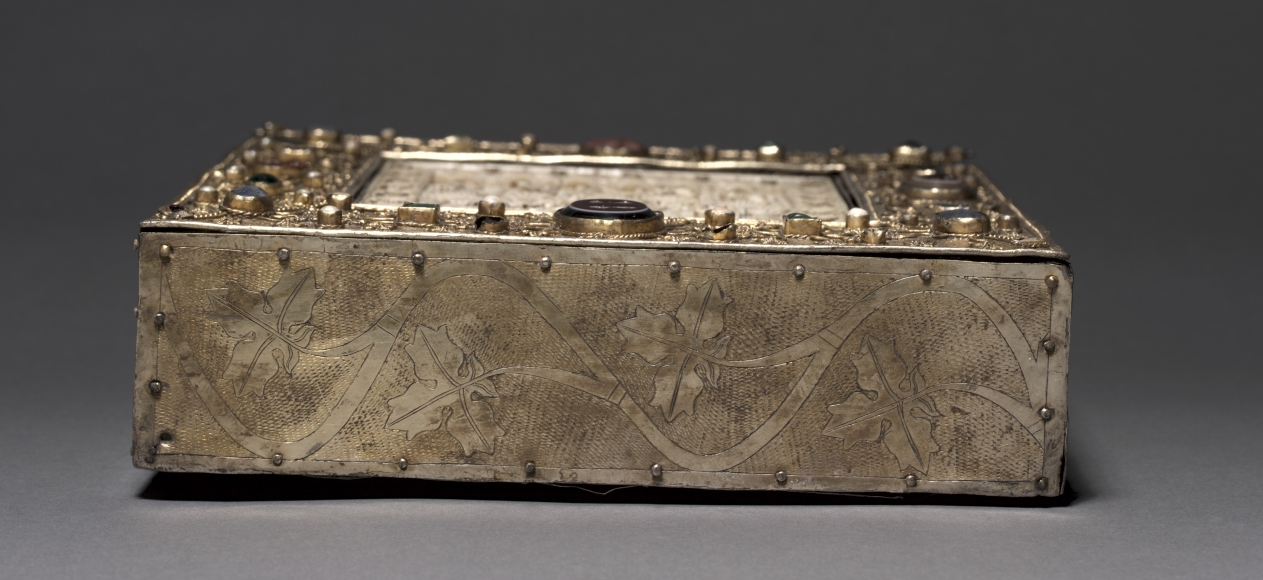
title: Book-Shaped Reliquary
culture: Ivory: Ottonian, Lorrain; Frame: Germany, Lower Saxony, Brunswick, Gothic period, 14th century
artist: circle of The Master of the Registrum Gregorii (German, active c. 972–1000)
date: c. 1000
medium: ivory, silver: gilded, pearls, rubies, emeralds, crystals, onyx, carnelian, oak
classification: Metalwork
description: This sumptuous object closely resembles a deluxe medieval book cover in both form and decoration. It was likely commissioned by Otto the Mild, Duke of Saxony (reigned 1318–48) around 1340. It was made to contain a leaf from each gospel and relics of the 11,000 virgins and 4 other saints. These relics were originally kept in a cavity behind the delicately carved ivory plaque depicting scenes from the Wedding at Cana (John 2:1–11). The story of Christ's first miracle is presented in three scenes. In the upper left, the Virgin informs Christ and his apostles of the lack of wine at the wedding banquet. On the right, the groom, his bride, and their guests sit behind a table, two servants offering them goblets. In the lower register, two attendants pour water into the first of six storage vessels while Christ addresses his mother and the bride. The back of the reliquary shows the engraved figures of the main patron saints of Brunswick Cathedral: placed within a delicate Gothic architectural frame, Saint John the Baptist is flanked by Saints Blaise and Thomas Becket.